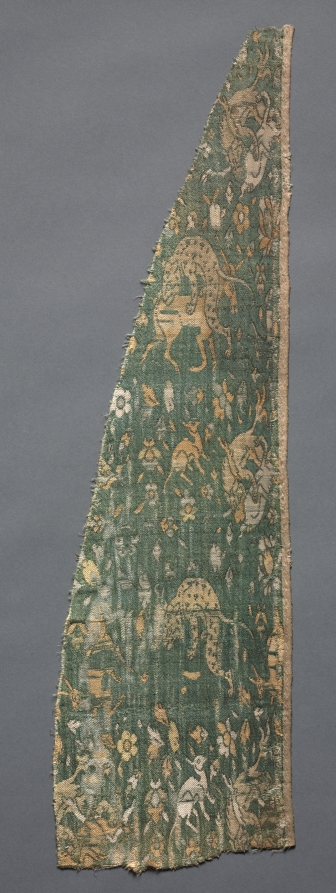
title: Lampas with scenes of wild animals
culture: Iran, Safavid period (1501–1722)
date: 1500s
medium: silk and gold: lampas weave, brocaded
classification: Textile